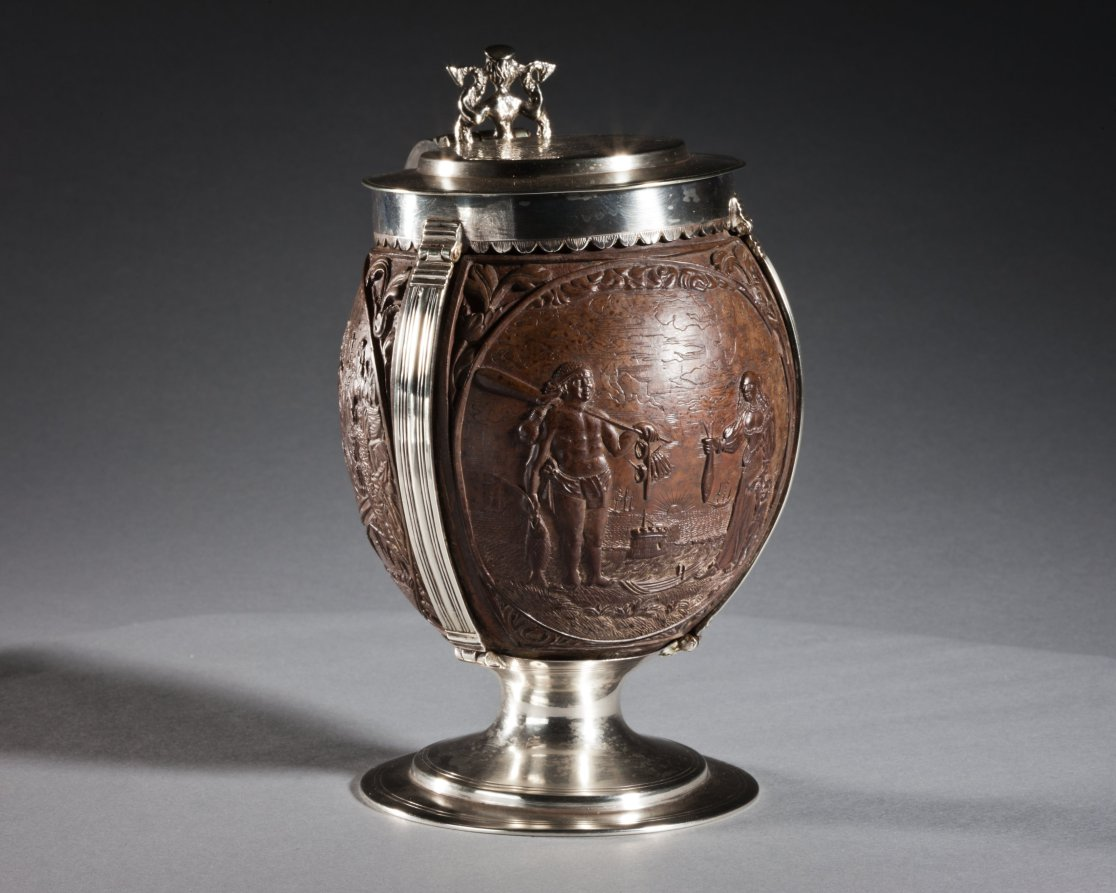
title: Coconut Cup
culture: carved coconut, probably The Netherlands; silver mount, probably England, 17th century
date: c. 1630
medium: carved coconut in silver mount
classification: Metalwork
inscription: top lid has engraved coat-of-arms, underside of lid has inscription: George Lewis TIVERTON Feby, 1st 1760.